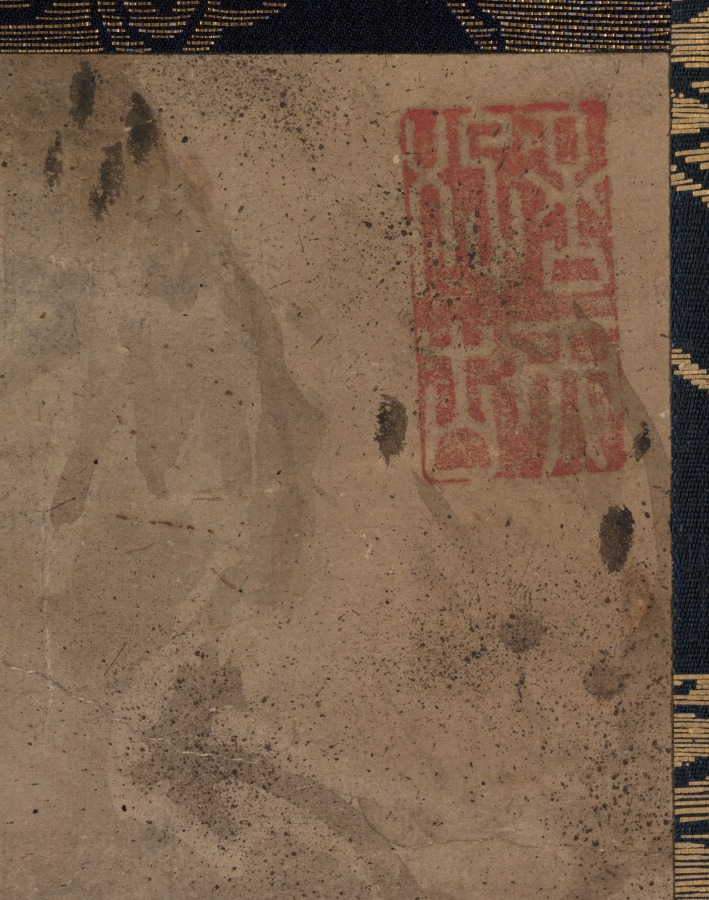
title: Monkeys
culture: Japan, Edo period (1615–1868)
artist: Gyokutei Katsu (Japanese)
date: c. 1800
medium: hanging scroll; ink on paper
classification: Painting